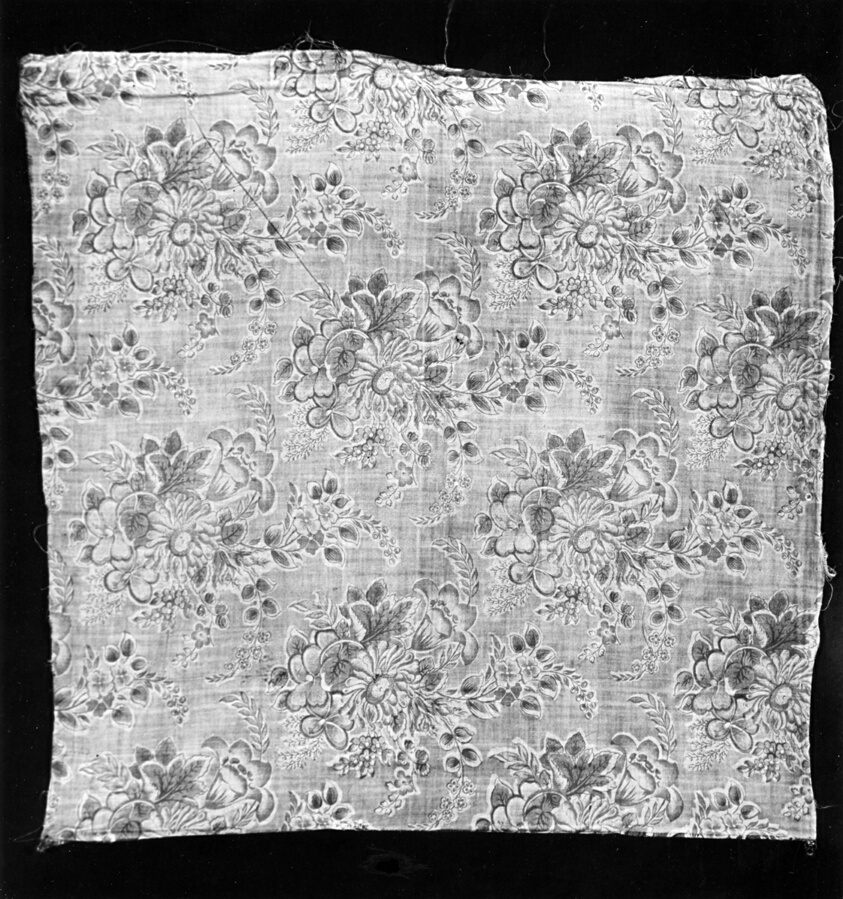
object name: Textile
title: Panel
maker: England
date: 19th century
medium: Cotton, plain weave; roller printed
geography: England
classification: textile; weaving - printed; weaving